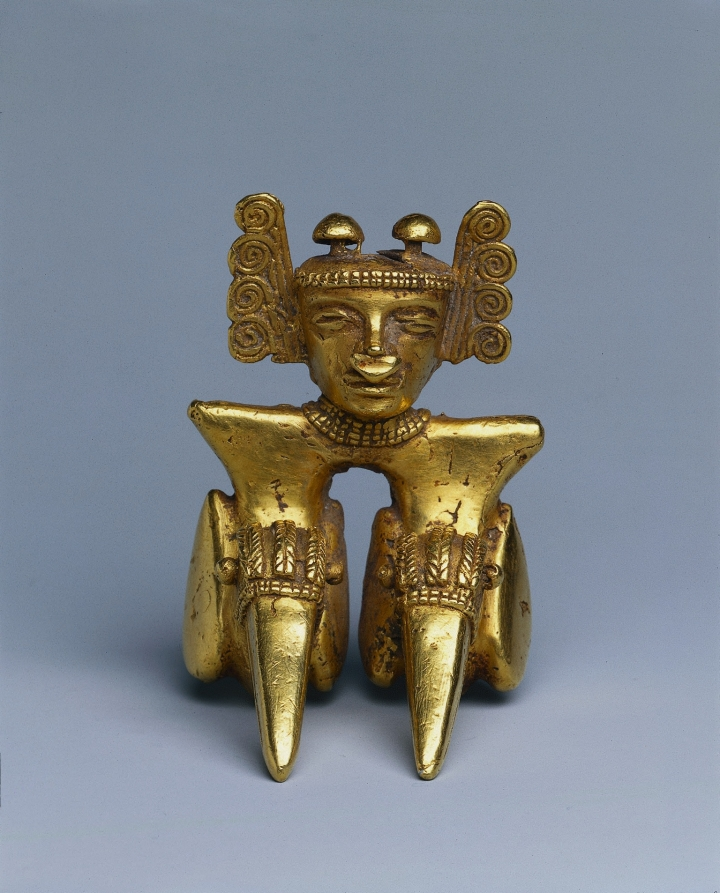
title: Pendant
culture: Panama, International Style, 5th-8th century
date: 400–700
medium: cast gold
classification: Metalwork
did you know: In the Panama-Costa Rica region, gold ornaments were associated with political and religious authority.